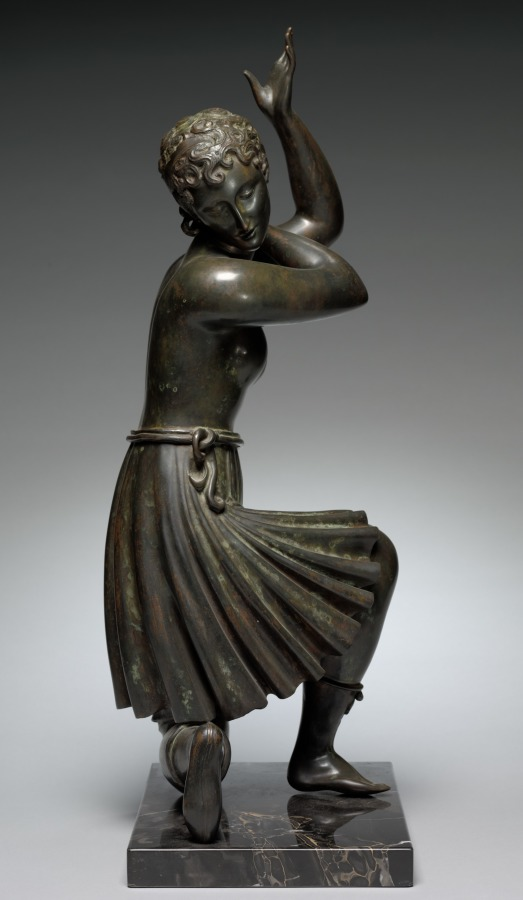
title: Dancing Figure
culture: America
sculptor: Elie Nadelman (American, born Russian Empire [now Poland], 1882–1946)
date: 1916–18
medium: bronze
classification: Sculpture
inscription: Signed: Elie Nadelman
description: Dancing Figure displays the geometrically simplified forms and softened angles that are a hallmark of Elie Nadelman’s work. Its spiraling composition presents a woman whose body partially twists on bended knee. Her raised arms echo the position of her legs.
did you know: A larger version of this sculpture was originally conceived in limestone to decorate an outdoor garden in Long Island.